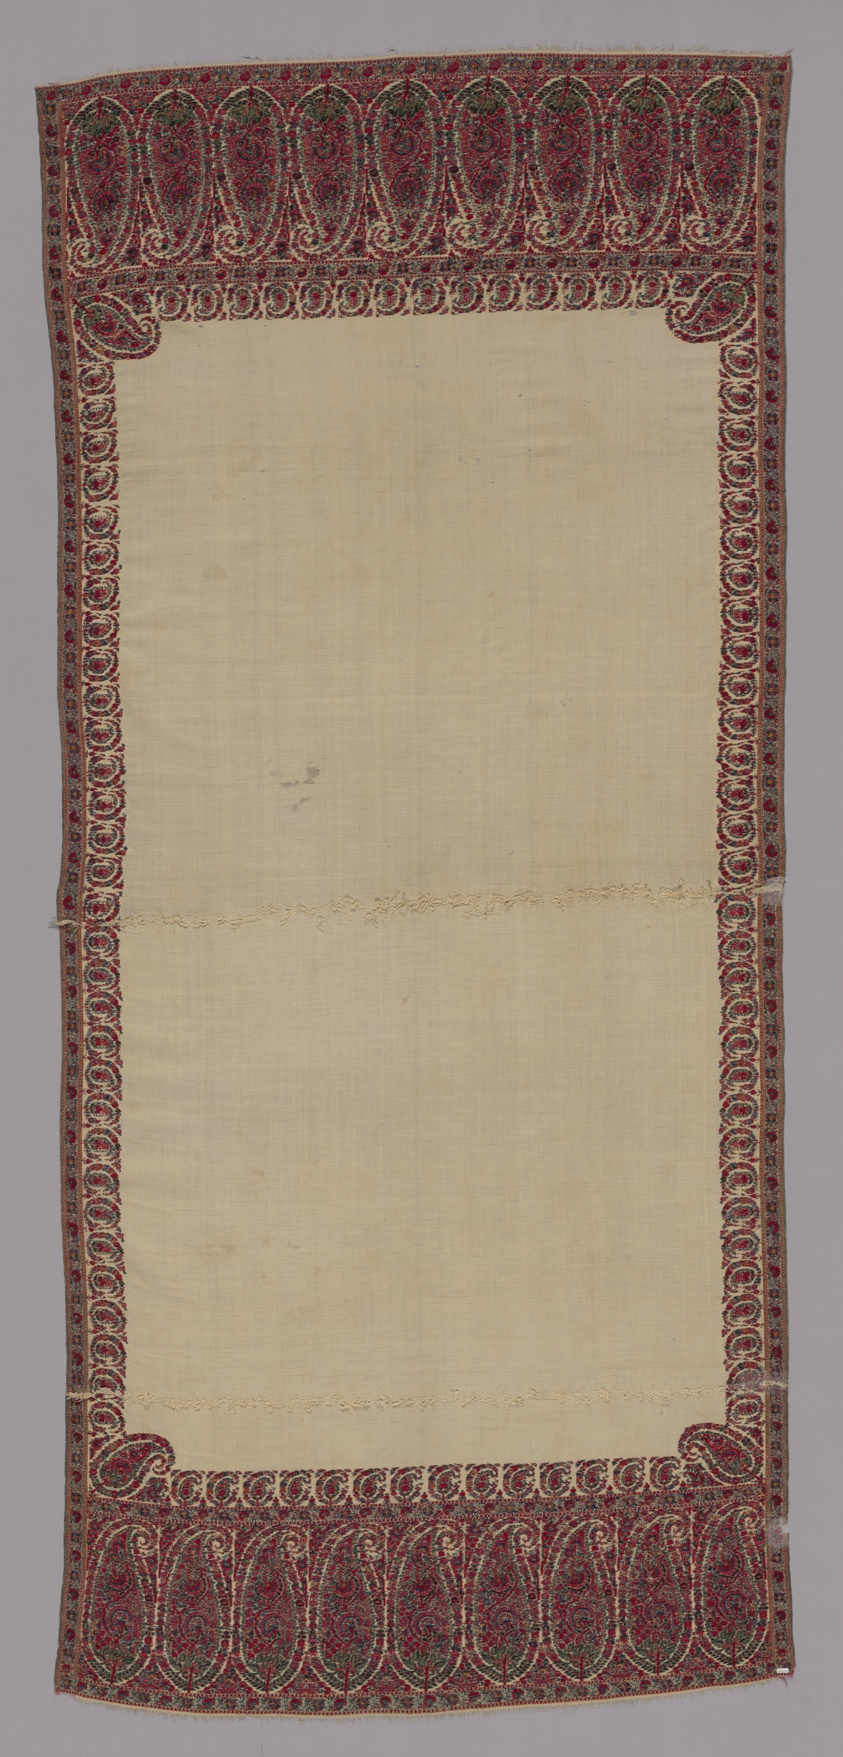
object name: Costume and Accessories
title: Palledar (Long Shawl)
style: 19th century, kashmiri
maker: Kashmir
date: 1815-25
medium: Wool; center, twill; ends and border, double interlocking twill tapestry weave; main warp fringe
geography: Kashmir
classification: textile; weaving; garment; costume; costume - weaving; costume accessory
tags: paisley, flowers, floral motifs